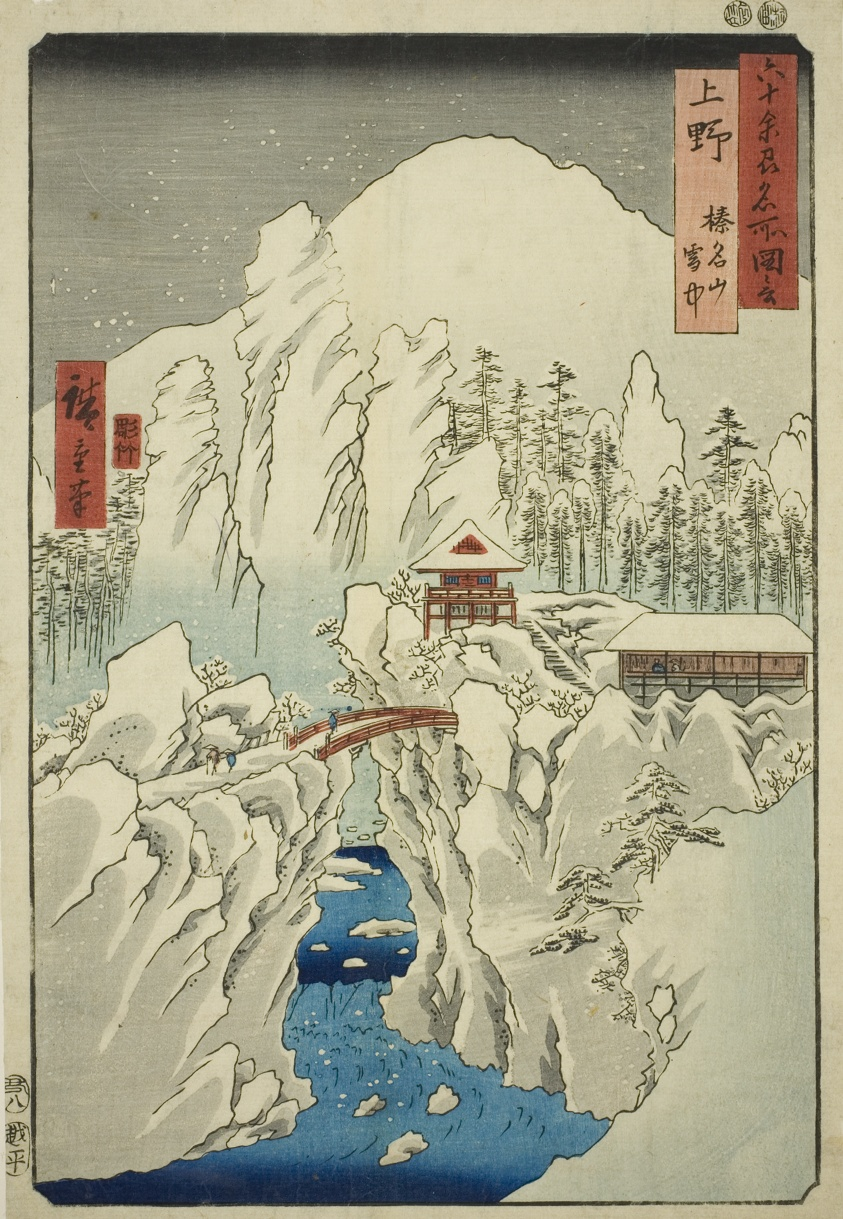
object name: Print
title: Kozuke Province: Mount Haruna in Snow (Kozuke, Harunasan setchu), from the series "Famous Places in the Sixty-odd Provinces (Rokujuyoshu meisho zue)"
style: Japanese (culture or style)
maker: Utagawa Hiroshige 歌川 広重; Japanese, 1797-1858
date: 1853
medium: Color woodblock print; oban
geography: Japan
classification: woodblock print; print; asian art